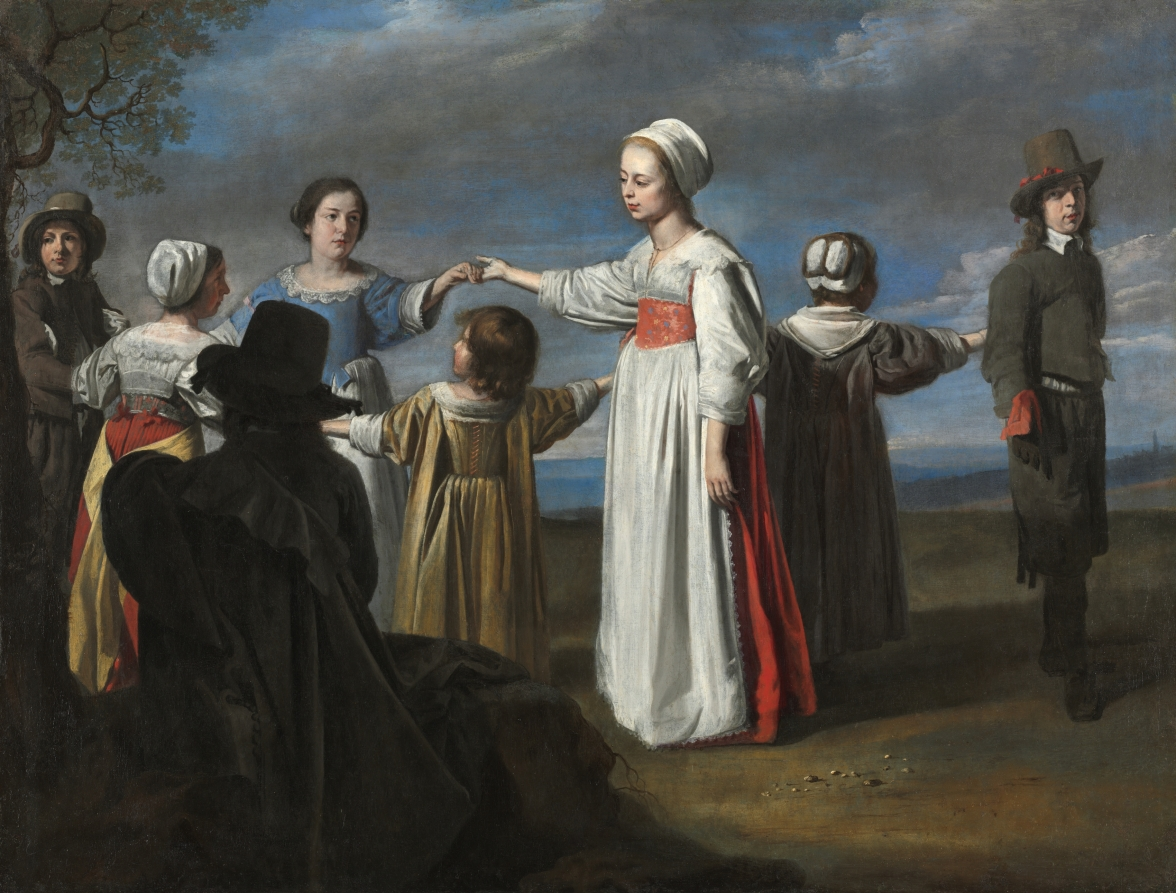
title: Children Dancing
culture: France, 17th century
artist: circle of Le Nain (French)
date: c. 1650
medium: oil on canvas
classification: Painting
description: Antoine, Louis, and Mathieu Le Nain were brothers who ran a collective studio in Paris from around 1630 until 1648, when Antoine and Louis died. Mathieu continued to produce work under their name "Le Nain" throughout the 1650s. Of the museum's four paintings that have been called "Le Nain" (1958.174, 1958.175.1, 1958.175.2), this work has held its attribution to Mathieu the longest. With his back to the viewer, a musician sits in shadow while a group of children pose patiently in a chain-like formation, awaiting the start of their dance. Because of its reliance on order and collaboration, dancing symbolized familial harmony. The attention to the individuality of the children suggest a family portrait, while their wistful expressions and melancholic tone have led to the hypothesis that the children are portraits-both living and posthumous. The description of the intricate lace and the wearied expressions of the slim boys is characteristic of Mathieu's handling. However, the canvas has been attributed to one of Mathieu's followers, the Master of the Games, because of the static, brightly lit figures whose elongated shadows don't quite describe their forms.